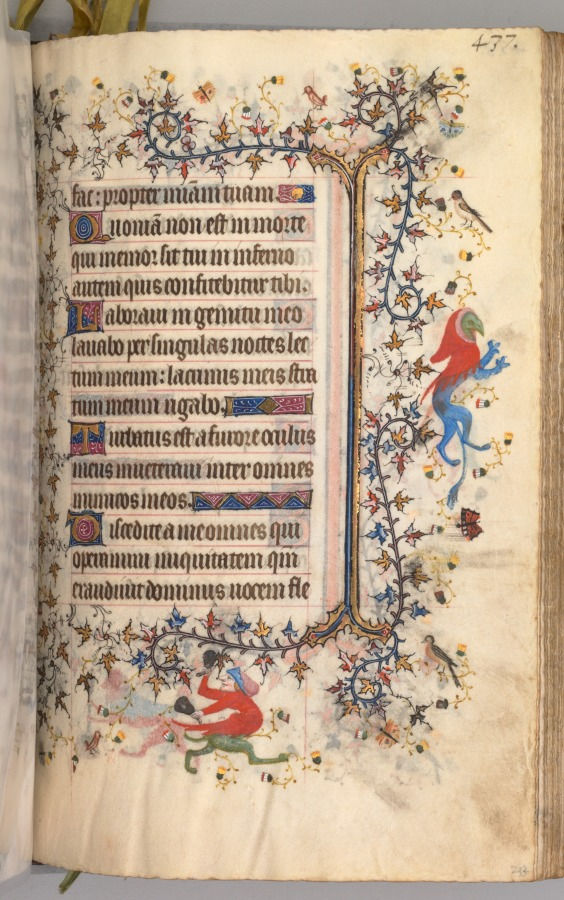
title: Hours of Charles the Noble, King of Navarre (1361-1425): fol. 213r, Text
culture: France, Paris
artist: Master of the Brussels Initials and Associates (French)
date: c. 1405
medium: ink, tempera, and gold on vellum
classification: Bound Volume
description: This precious volume was obviously highly prized by its owner, the French-born King of Navarre, who had his coat of arms painted on no less than twenty folios. Rather than directly commissioning this manuscript from a specific workshop, it seems that Charles the Noble acquired his book of hours -- perhaps ready-made for the luxury market -- while on a trip to Paris in 1404-05. A collaborative effort, six painting styles are evidenced within the pages of this codex, those of two Italians, two Frenchmen, and two Netherlanders. The painter who was responsible for the planning and decoration of the book, and who produced seventeen of the large miniatures, was a Bolognese artist known as the Master of the Brussels Initials. His principal assistant, responsible for most of the borders, was a Florentine who signed his name "Zecho" da Firenze on folio 208 verso.